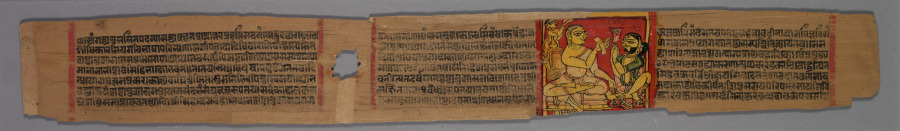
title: King Kumarapala Pays Reverence to Hemachandra: Folio 2 (recto), from a Great Poem about Twos (Dvyashraya Mahakavya) of Hemachandra with Commentary by Abhayatilaka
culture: Western India, Gujarat, possibly Patan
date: 1428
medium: Gum tempera and ink on palm leaf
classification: Painting